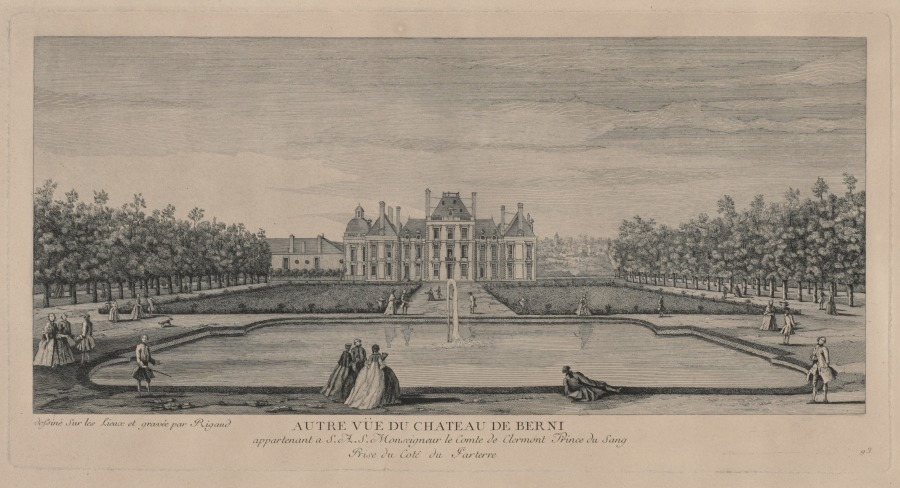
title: Chateau of Berny from the Gardens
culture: France, 18th century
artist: Jacques Rigaud (French, 1681–1754)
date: c. 1720–50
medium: engraving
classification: Print